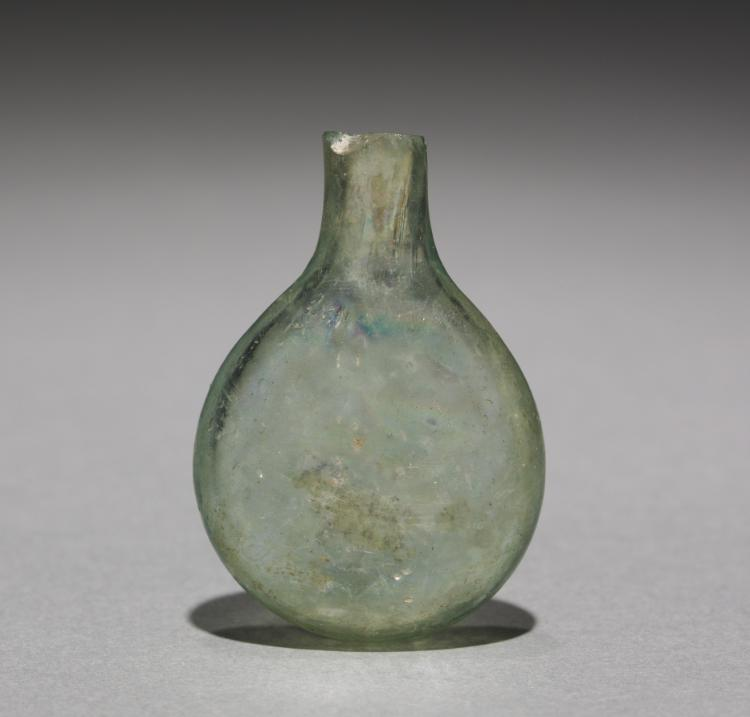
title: Pilgrim's Flask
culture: Byzantium, Syria-Palestine, 6th-7th century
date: 500–700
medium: green glass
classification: Glass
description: Ampullae (small flasks) from pilgrimage sites were made of metal, terracotta, or glass. Because of their fragility, glass ampullae survive less abundantly than the other materials.